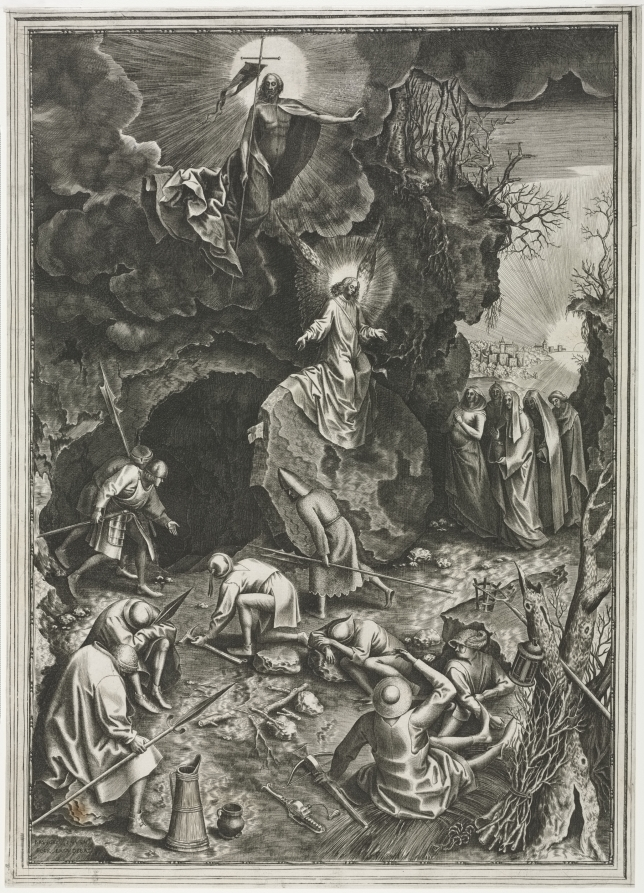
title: The Resurrection of Christ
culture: Netherlands, 16th century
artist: Philip Galle (Flemish, 1537–1612)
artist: after Pieter Bruegel (Netherlandish, c. 1525/30–1569)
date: c. 1562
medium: engraving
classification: Print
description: After Christ's crucifixion and burial, he rose from his tomb to dwell on earth for 40 days before ascending to heaven. According to the Gospel account of Matthew, as depicted here, the soldiers guarding the tomb fell asleep and the tomb opened miraculously. Christ appears above, triumphant. For Christians, the resurrection of Christ is essential for the doctrine of salvation and the hope of deliverance from the power and effect of sin. The promise of salvation, of a new day, is symbolized by the rising sun, to which Christ points, and Christ's halo, which resembles a sun. Galle's engraving is based on a monochrome wash drawing by Bruegel. The print, which is the same size as the drawing, but with the image reversed, even retains the frame.